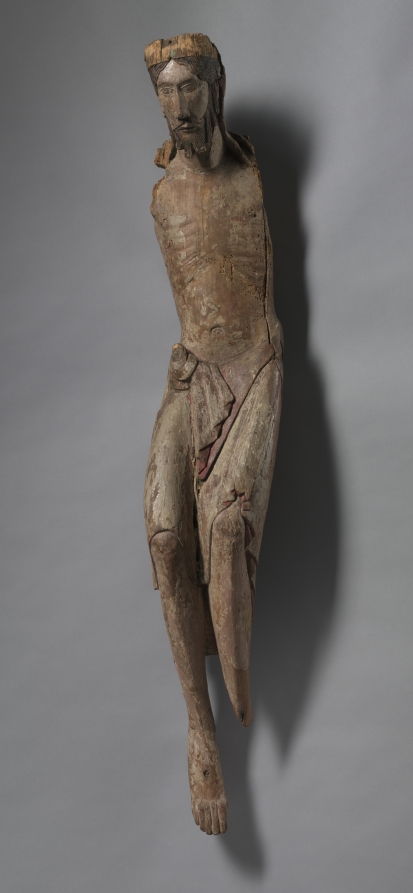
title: Corpus from a Crucifix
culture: France, Burgundy, Autun?, 12th century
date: c. 1130–1140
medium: polychromed wood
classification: Sculpture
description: By the 11th century, monumental crucifixes carved from wood and painted were a common feature of church interiors. Placed on or suspended above the main altar, they reminded viewers of Christ’s sacrifice on behalf of mankind at the Crucifixion, an event reenacted every time Mass was celebrated on the altar below. Crucifixes also invited prayer and meditation on Christ’s role as Redeemer. This fragmentary but finely carved corpus, or body of Christ, once belonged to such a crucifix.